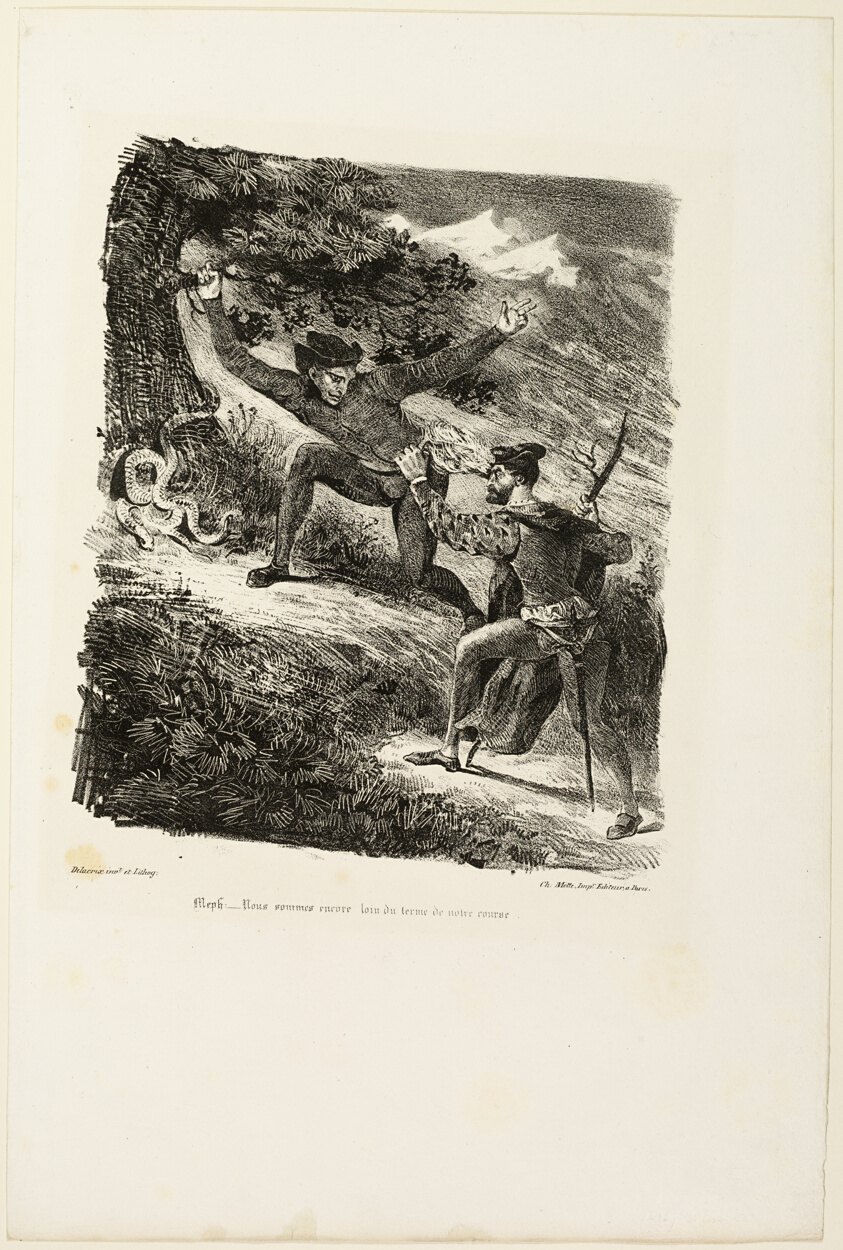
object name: Print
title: Faust and Mephistopheles in the Harz Mountains, from Faust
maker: Eugène Delacroix (French, 1798-1863)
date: 1828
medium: Lithograph in black on ivory wove paper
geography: France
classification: lithograph; print; prints and drawing